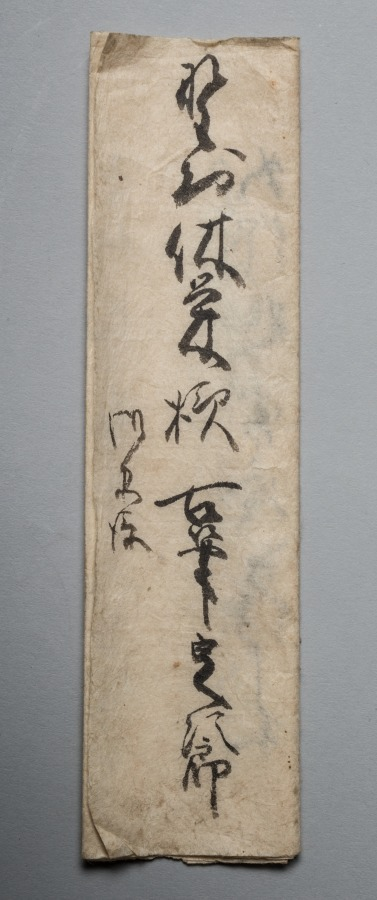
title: Section of an Illustrated Tale of Genji Poetry Contest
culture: Japan, Muromachi period (1392–1573)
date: 1400s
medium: section of a handscroll mounted as a hanging scroll; ink on paper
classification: Painting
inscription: 四十六番 左 ひげくろの大将 心さえ空にみだれし雪の［も」夜に ひとりさえつるかたしきの袖／ 四十七番 うきことを思ひさわ げばさまざまに くゆるけむりぞ いとど たち そふ／ 四十八番 すがくれてかず にも あらぬ かりのこを いづかたにかはとりかくすべき／ 右 雲井のかり かぎりとてわすれがたきを わするるも こや世に なびくこころな るらむ／ あさきなを いひ ながしける かわ ぐちは いかが もらしし せきのあらがき／ あわれをもいかに しりてか なぐさ めむ あるや 恋しき なきや かなしきに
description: This hanging scroll was once part of a handscroll depicting a waka (thirty-one syllable verse) poetry contest between characters from the 11th-century literary classic Tale of Genji. In this section, a woman known informally as Kumoi no kari, or “Goose in Fog,” after a lovelorn line she hums in the novel, is pitted against Higekuro no taishō, or “General Blackbeard.” Three of his poems, numbered 46 to 48, from “The Handsome Pillar” chapter appear over his image. The subsequent three poems inscribed above Kumoi no kari are presented as her “responses,” and come from "The Plum Tree Branch", “New Wisteria Leaves”, and "Evening Mist" chapters.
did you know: General Blackbeard laments having smelly ash poured upon him by his angry wife in one of the poems.